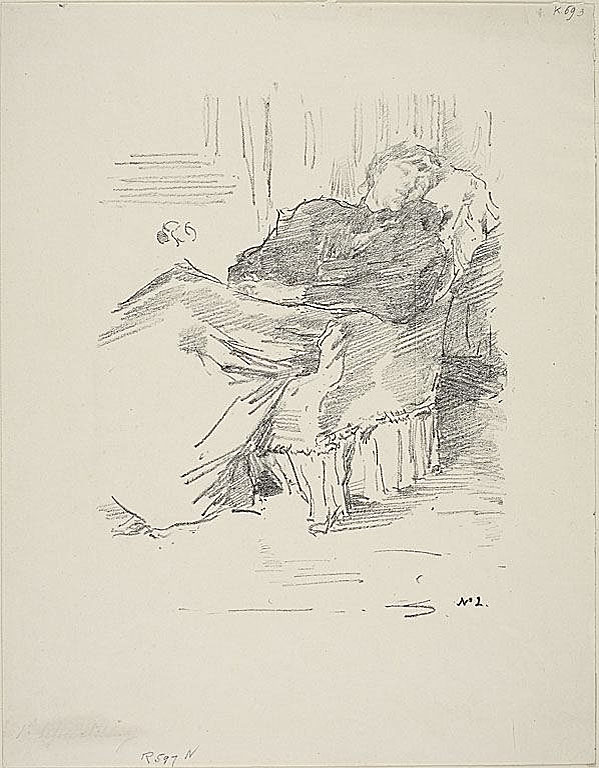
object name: Print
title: La Belle Dame endormie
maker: James McNeill Whistler (American, 1834-1903)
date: 1894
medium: Transfer lithograph in black on ivory wove proofing paper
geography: United States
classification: transfer lithograph; lithograph; print; prints and drawing; paper